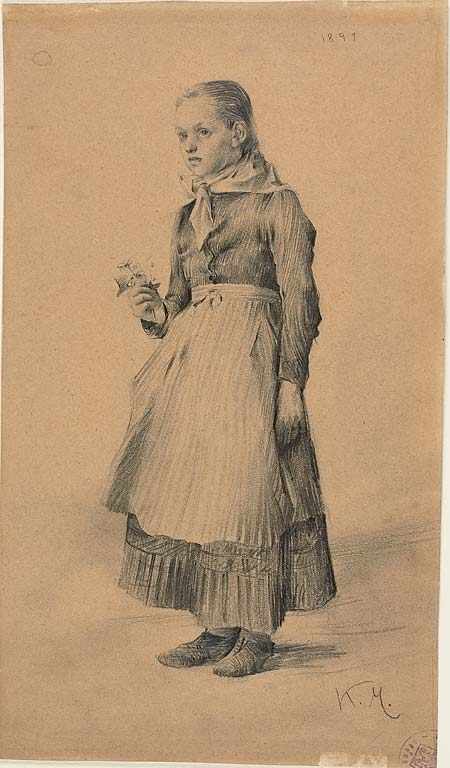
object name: Drawing and Watercolor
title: Girl in Peasant Dress (recto); Sheet of Sketches: Women and Girls (verso)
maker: Karel Vitezslav Masek (Czech, 1865-1927)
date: 1891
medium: Graphite (recto and verso) on cream wove paper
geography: Czech Republic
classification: graphite; drawings (visual works); prints and drawing